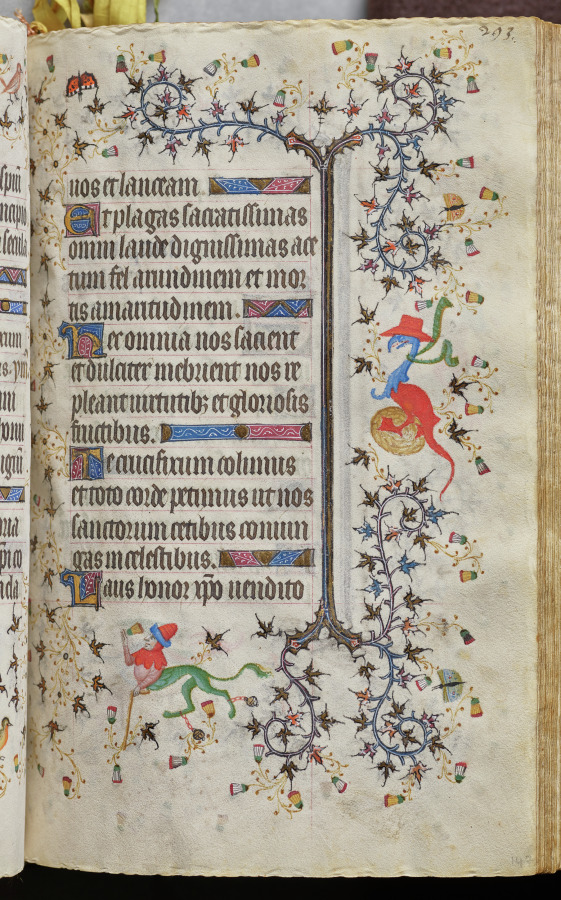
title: Hours of Charles the Noble, King of Navarre (1361-1425): fol. 147r, Text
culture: France, Paris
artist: Master of the Brussels Initials and Associates (French)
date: c. 1405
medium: ink, tempera, and gold on vellum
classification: Bound Volume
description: This precious volume was obviously highly prized by its owner, the French-born King of Navarre, who had his coat of arms painted on no less than twenty folios. Rather than directly commissioning this manuscript from a specific workshop, it seems that Charles the Noble acquired his book of hours -- perhaps ready-made for the luxury market -- while on a trip to Paris in 1404-05. A collaborative effort, six painting styles are evidenced within the pages of this codex, those of two Italians, two Frenchmen, and two Netherlanders. The painter who was responsible for the planning and decoration of the book, and who produced seventeen of the large miniatures, was a Bolognese artist known as the Master of the Brussels Initials. His principal assistant, responsible for most of the borders, was a Florentine who signed his name "Zecho" da Firenze on folio 208 verso.